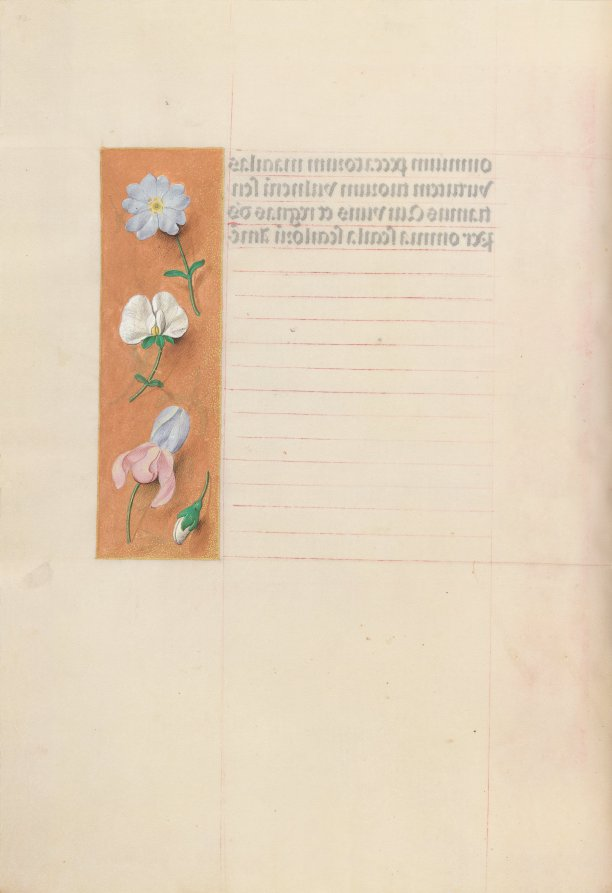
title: Hours of Queen Isabella the Catholic, Queen of Spain: Fol. 68v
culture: Flanders, Ghent and Bruges, late 15th century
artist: Master of the First Prayerbook of Maximillian (Flemish, c. 1444–1519)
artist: and Associates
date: c. 1500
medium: ink, tempera, and gold on vellum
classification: Bound Volume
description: This manuscript was illuminated by a circle of at least five highly organized manuscript painters active in the Flemish cities of Ghent and Bruges. The principal illuminator was Alexander Bening, who painted the majority of the book's miniatures. Manuscripts produced by this circle of artists are renowned for the decoration of their borders, which typically feature a rich variety of realistically-painted flowers, birds, and butterflies. This prayer book, called a book of hours, was intended not for a cleric, but for the private devotions of a lay person-in this case, Isabella the Catholic, Queen of Spain (1451-1504). Isabella's coat of arms embellishes the book's frontispiece. It is unlikely that the book was commissioned by the Queen herself; rather, she probably received it as a diplomatic gift from someone courting her patronage, perhaps Cardinal Francisco Jimenez de Cisneros. A Franciscan friar, Jimenez was dependent upon Isabella for his advancement, first to the post of Queen's confessor in 1492, and then to Archbishop of Toledo in 1495.